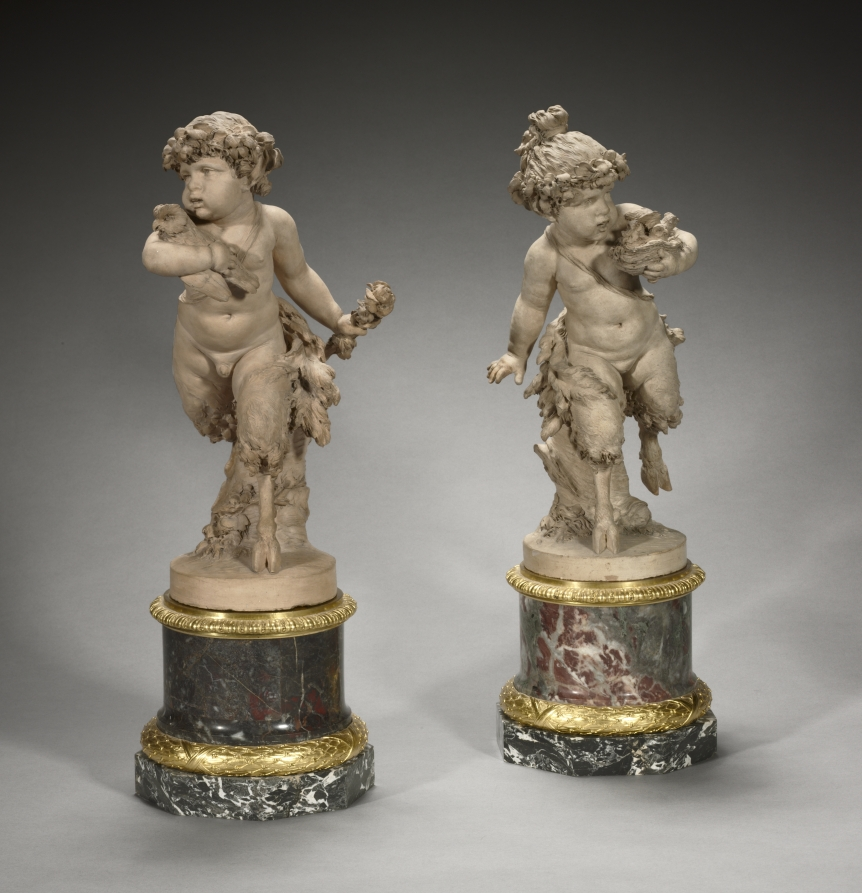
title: Young Satyress Running with an Owl's Nest and Young Satyr Running with an Owl (pair of statuettes)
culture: France, 18th century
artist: Clodion (French, 1738–1814)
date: 1770s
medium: terracotta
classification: Sculpture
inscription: signature incised on back: CLODION.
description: These works by the French sculptor Claude Michel, called Clodion, show a pair of young satyrs. Clodion was fond of depicting characters from classical antiquity in his work, and the subject of child or baby satyrs in Bacchanalian celebrations appears often in the work of Rococo artists. The female satyr wraps a plump arm around a nest filled with baby birds, while her male counterpart holds an owl. Balancing on one foot, the two flee the scene of their theft.